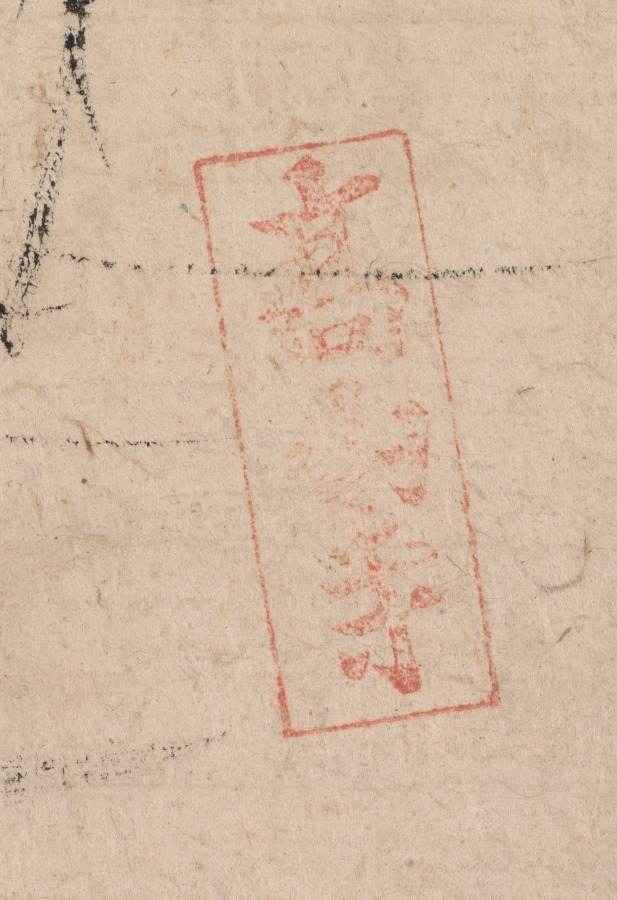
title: White-Robed Kannon (Byakue Kannon)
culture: Japan, Kamakura period (1185–1333)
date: c. 1200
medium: hanging scroll; ink on paper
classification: Painting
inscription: 箱書 石座観音 高山寺舊蔵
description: Kannon is a deity of mercy and compassion in the Buddhist faith. This monochrome sketch comes from Kōzan-ji, a temple in northwest Kyoto. The subdued ink tones and plain brushwork reflect the taste of Zen Buddhism, which began to have an impact on the visual arts in 13th-century Japan.